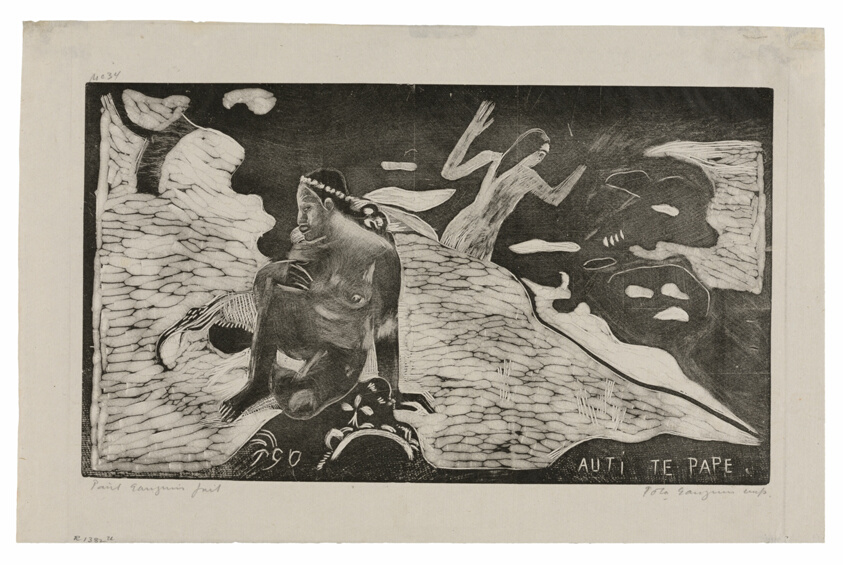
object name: Print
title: Auti te pape (Women at the River) from the Noa Noa Suite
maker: Paul Gauguin (French, 1848-1903); printed by Pola Gauguin (Danish, born France, 1883-1961); published by Christian Cato, Copenhagen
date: 1893/94, printed and published 1921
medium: Wood-block print in black ink on grayish-ivory China paper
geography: France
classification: woodcut; print; prints and drawing